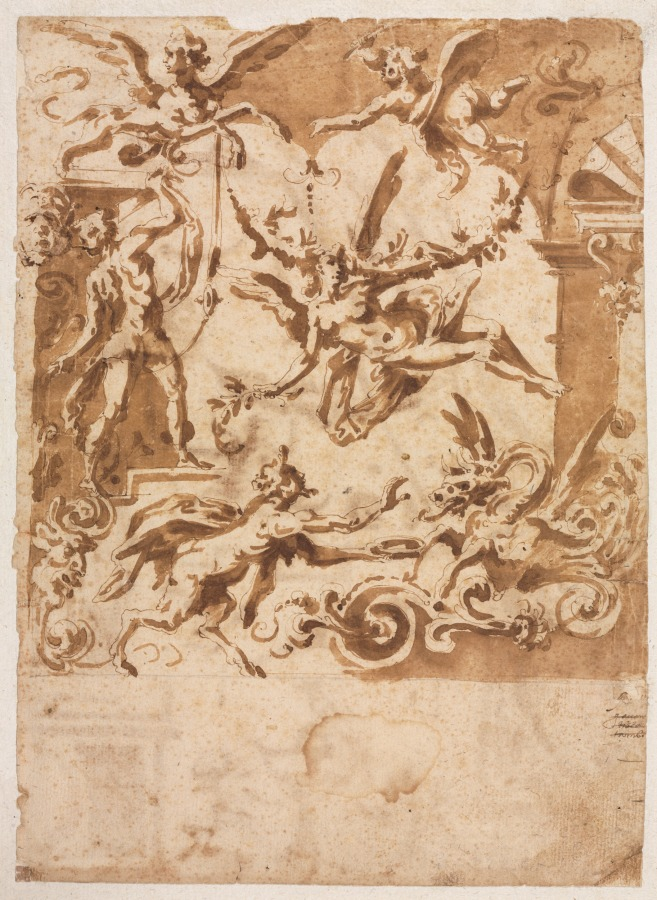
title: Grotesque with a Satyr Feeding a Dragon (recto); Grotesque with a Leaping Centaur (verso)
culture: Italy, 16th century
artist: Marco Marchetti (Italian, 1565–1588)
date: c. 1565/1588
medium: pen and brown ink and brush and brown wash, over traces of black chalk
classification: Drawing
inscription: lower right, by unknown hand, in brown ink: g[illegible] / [gauani ?][crossed out] / Fisza [crossed out] / tromb. [crossed out]